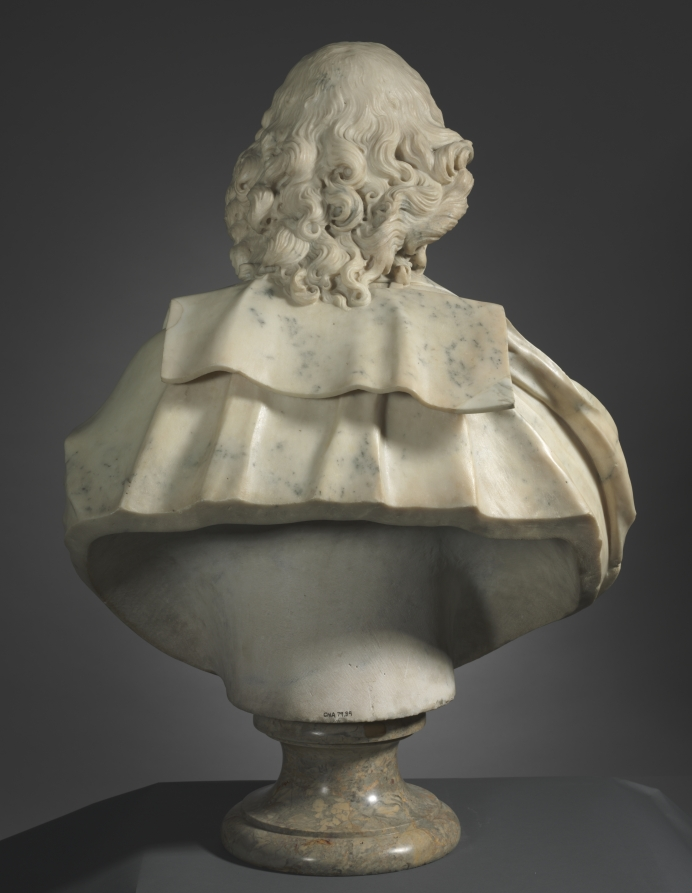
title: Portrait of Fabrizio Naro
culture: Italy, Rome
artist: Domenico Guidi (Italian, 1625–1701)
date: c. 1680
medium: marble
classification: Sculpture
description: This figure’s individualized facial expression, dynamic turn of the head and animated drapery are all characteristic of 17th-century Roman portrait sculpture. Guidi, a pupil of Alessandro Algardi, juxtaposed broad swaths of drapery and deeply drilled and carved hair with delicate surface detail, visible here in the patterning of the jacket and the faint suggestion of a beard. Based on a comparison with a later portrait on the family tomb in the church of Santa Maria sopra Minerva, Rome, the sitter has been identified as Fabrizio Naro (d. 1697), marquis of Mompei.